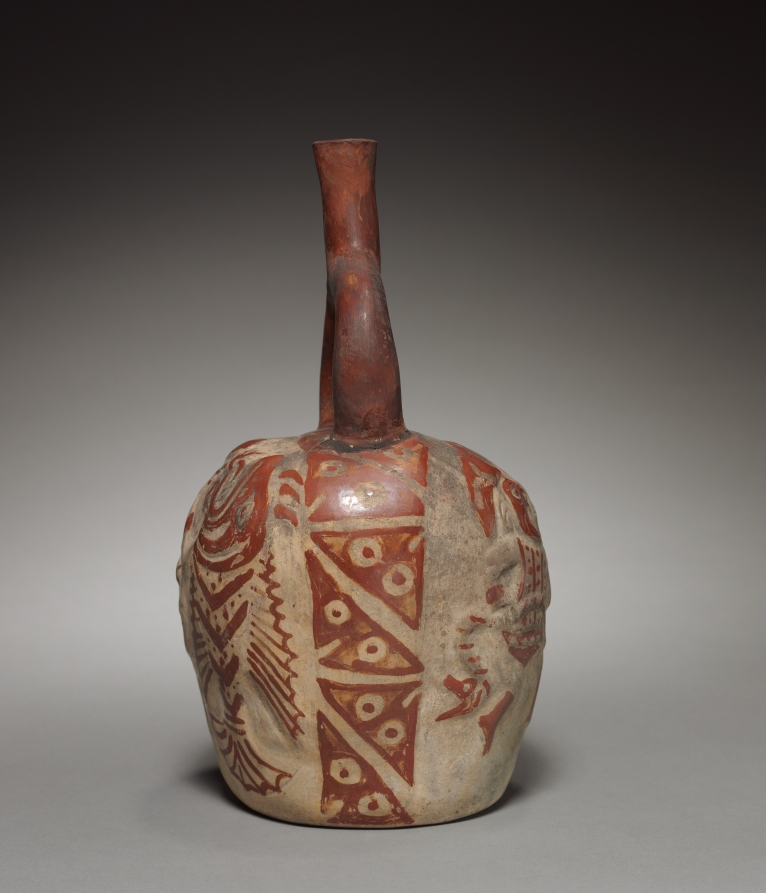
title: Bottle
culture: Peru, Chimú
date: c. 300–500 CE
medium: pottery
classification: Ceramic